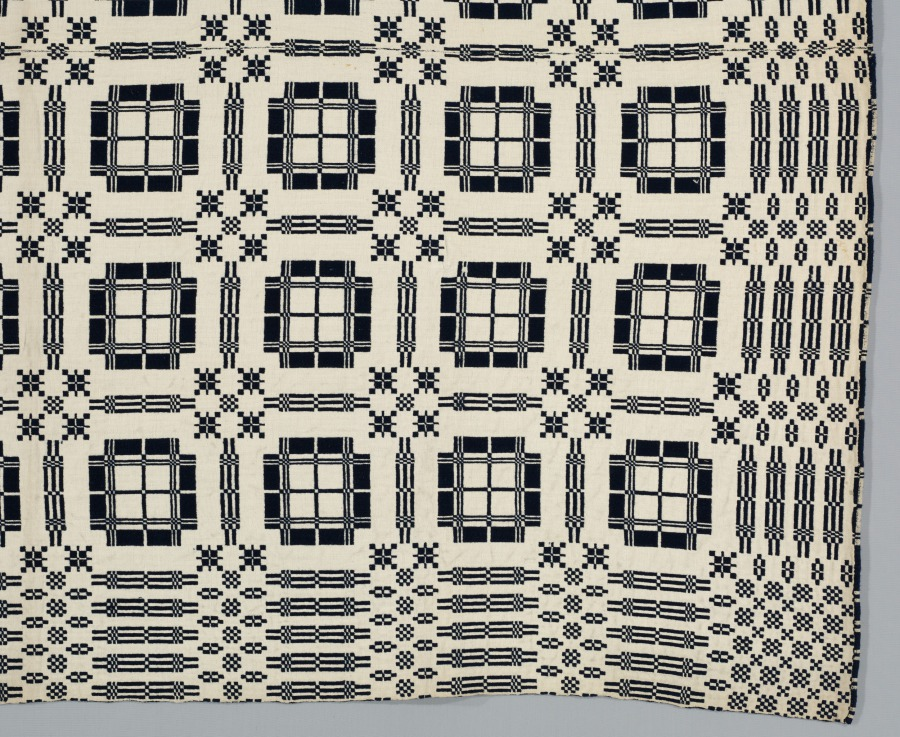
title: Coverlet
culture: America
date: 19th century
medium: wool and cotton; double cloth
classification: Textile